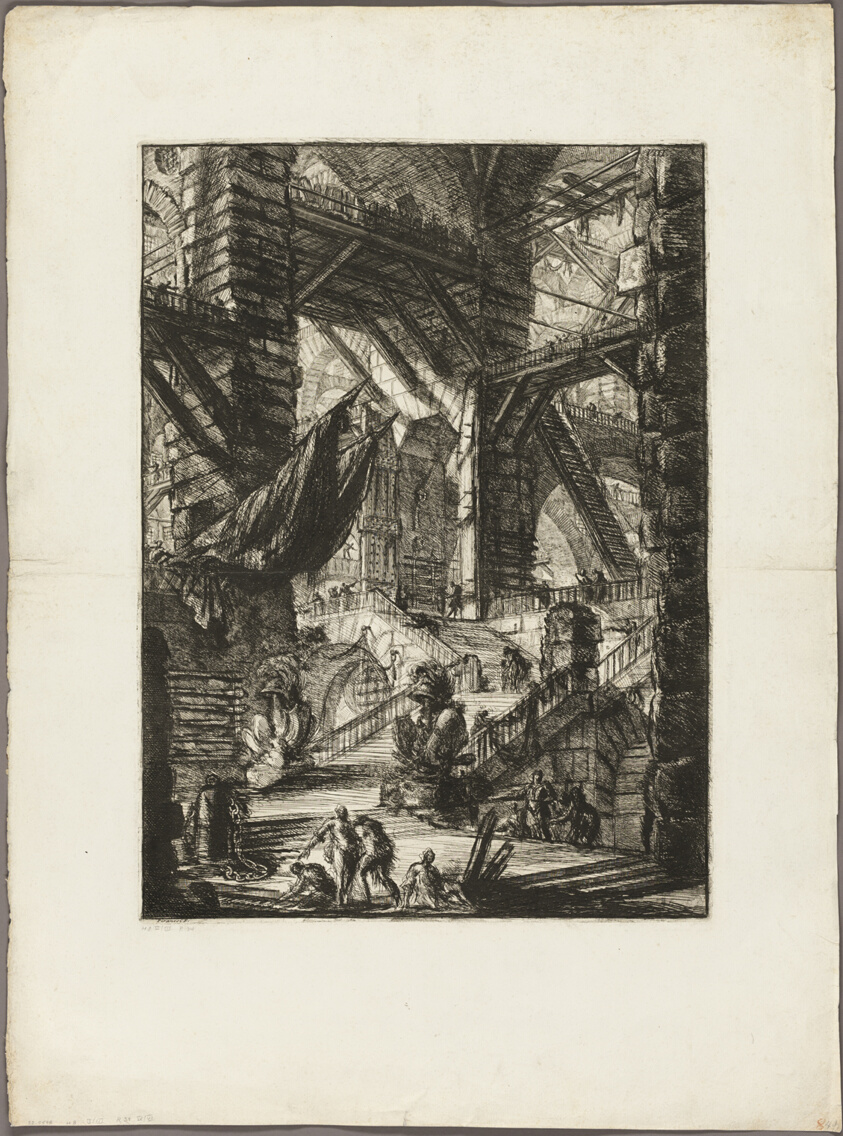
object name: Print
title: The Staircase with Trophies, plate 8 from Imaginary Prisons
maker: Giovanni Battista Piranesi (Italian, 1720-1778)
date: 1761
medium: Etching and engraving on heavy ivory laid paper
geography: Italy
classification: etching; print; prints and drawing